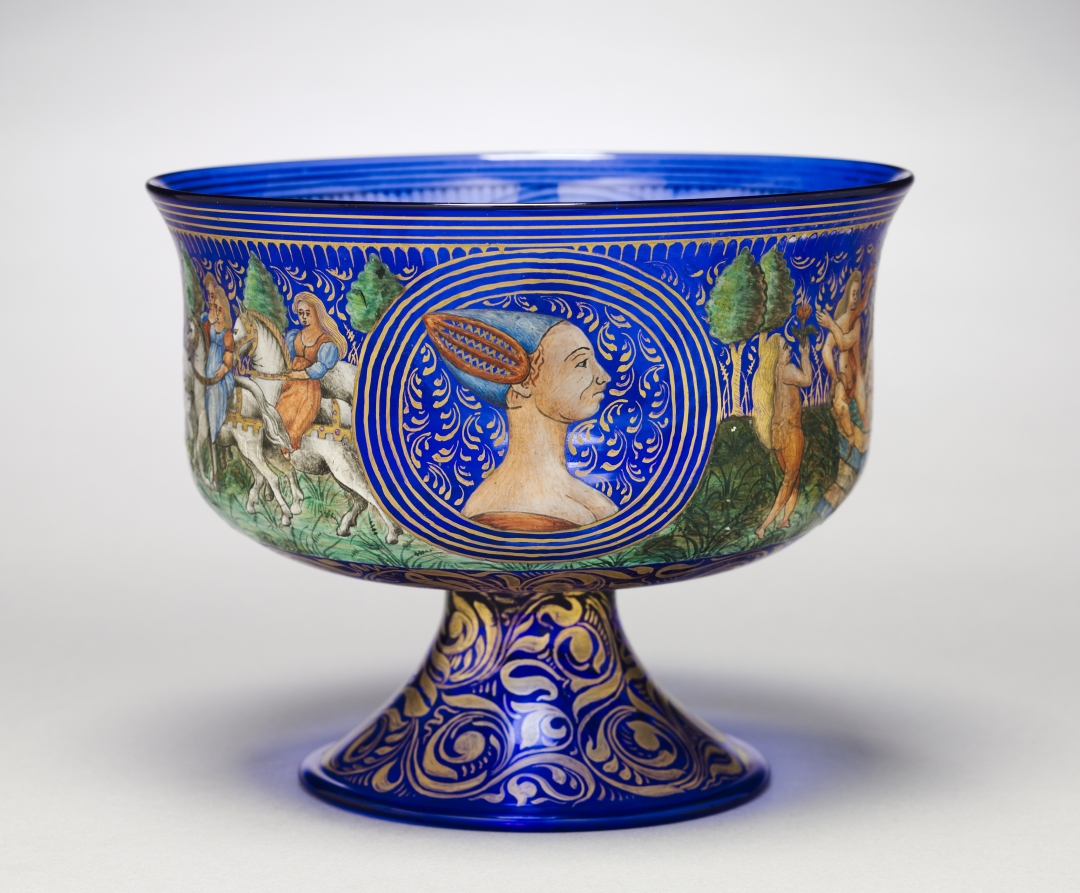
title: Footed Bowl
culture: Italy, Venice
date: 1850–99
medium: glass decorated with polychrome enamel and gilt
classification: Glass